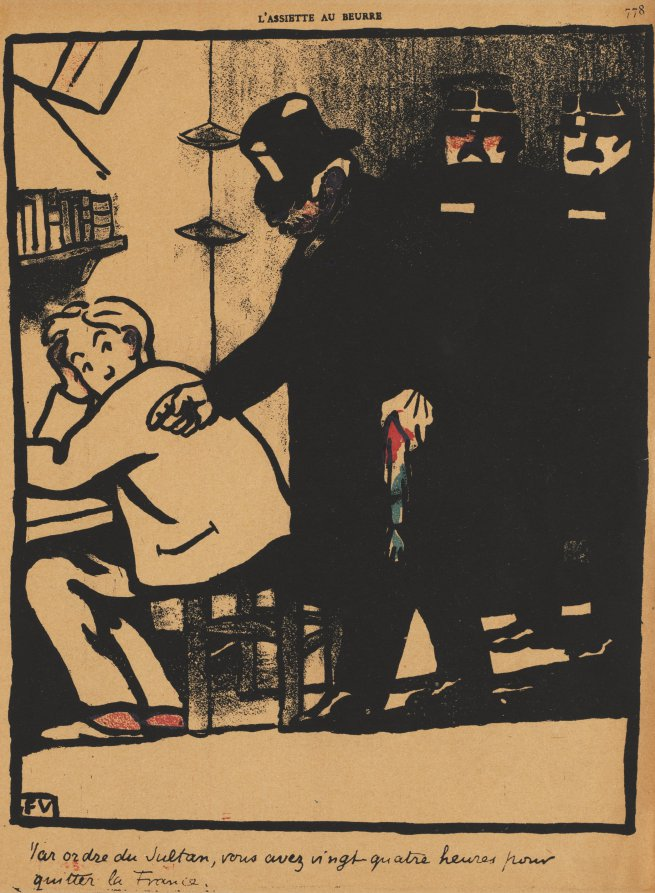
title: By order of the Sultan...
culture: France, 19th century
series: Crimes and Punishments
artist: Félix Vallotton (Swiss French, 1865–1925)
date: 1901, published 1902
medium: color lithograph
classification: Print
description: This print was published in the magazine L’Assiette au Beurre (March 1, 1902 ) as plate 21 from the series Crimes and Punishments.